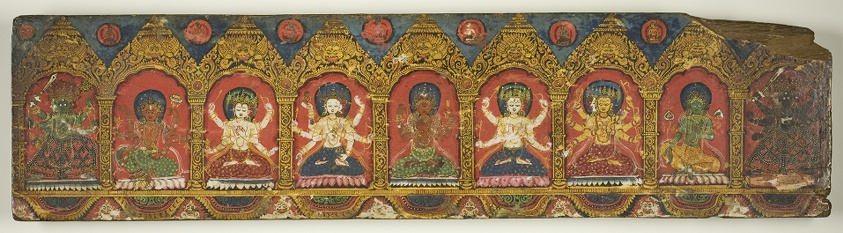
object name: Religious/Ritual Object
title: One of a Pair of Magical Charms (Dharani) Manuscript Covers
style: Himalayan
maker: Nepal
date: 18th century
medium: Pigment and metallic paint on wood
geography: Nepal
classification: manuscript; ritual objects